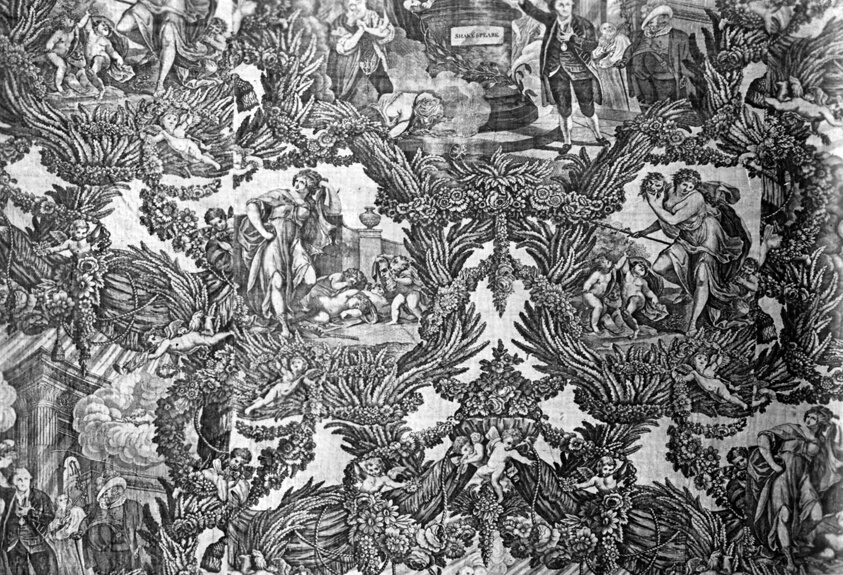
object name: Textile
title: Garrick and Shakespeare with Tragedy and Comedy (Furnishing Fabric)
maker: After a painting by Robert Edge Pine (English, c. 1730–1788); Engraved by Caroline Watson (English, 1760–1814); England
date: c. 1790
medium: Cotton, plain weave; engraved roller printed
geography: England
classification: textile; weaving - printed; furnishing textile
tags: propaganda